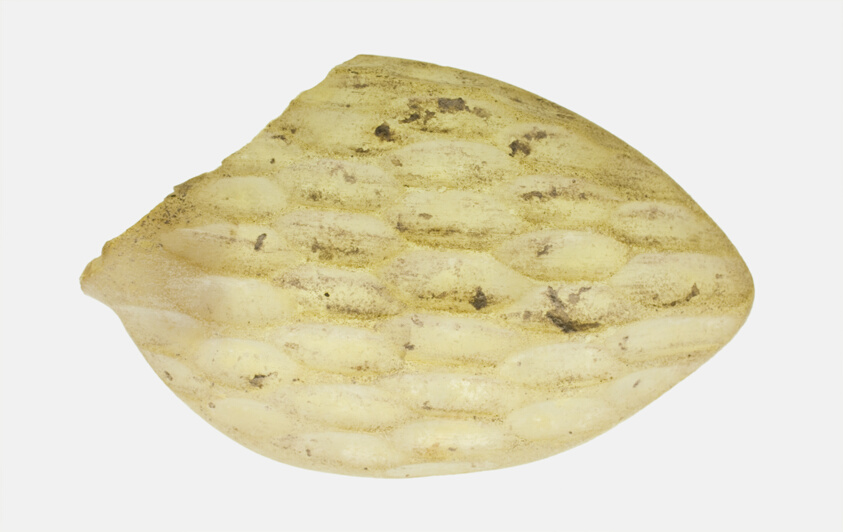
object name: Decorative Arts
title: Fragment of a Spoon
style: roman (ancient, style or period), ancient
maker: Roman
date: late 1st-2nd century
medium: Glass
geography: Roman Empire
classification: fragment; decorative arts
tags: dining